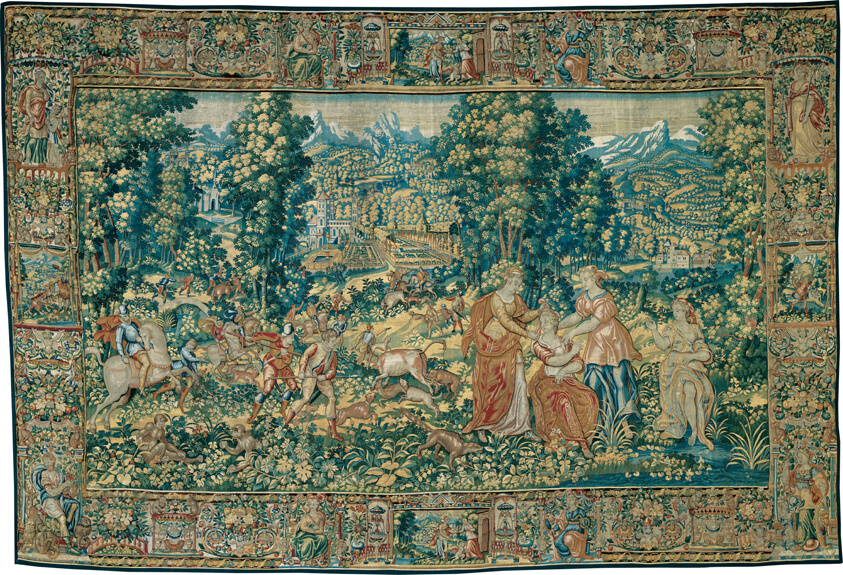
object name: Textile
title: Diana and Her Nymphs with the Ox Hunt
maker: With a scene after an engraving by Adriaen Collaert (c. 1560–1618) after Hans Bol (1534–1593), Ox Hunt; Flanders, Brussels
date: c. 1600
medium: Wool and silk, slit and double interlocking tapestry weave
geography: Flanders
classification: weaving - tapestry; textile